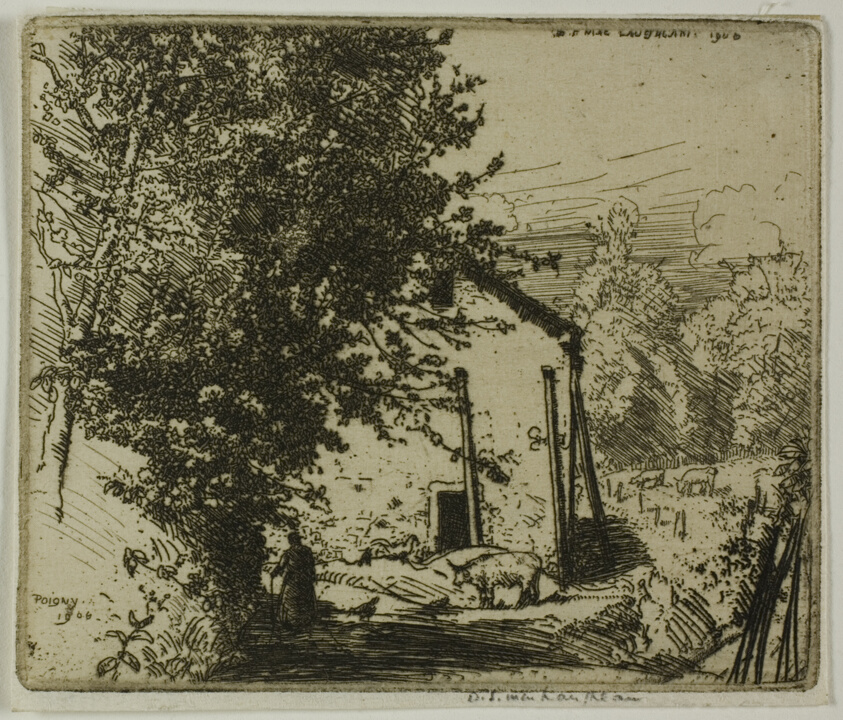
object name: Print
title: Little Poigny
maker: Donald Shaw MacLaughlan (American, born Canada, 1876-1938)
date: 1906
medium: Etching in black on cream laid paper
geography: United States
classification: etching; print; prints and drawing